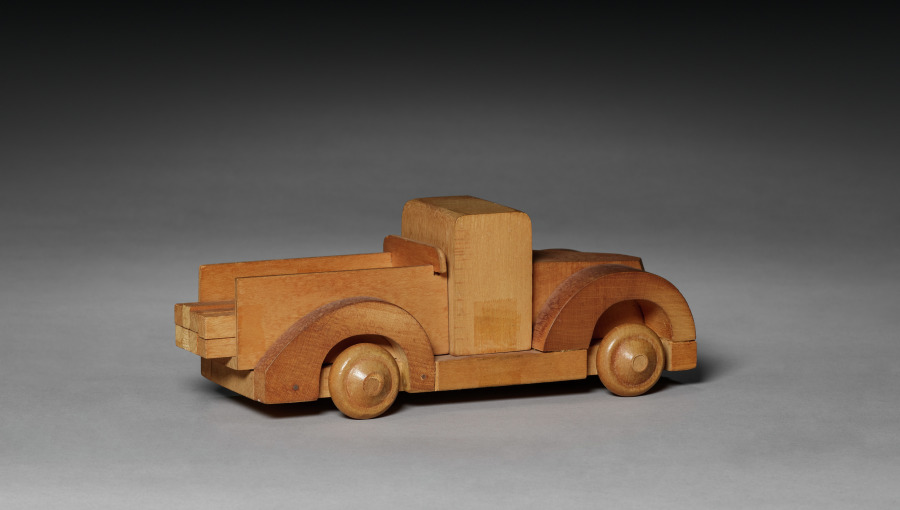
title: Boysen Toys (truck)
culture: Denmark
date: 1900s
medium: Wood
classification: Wood